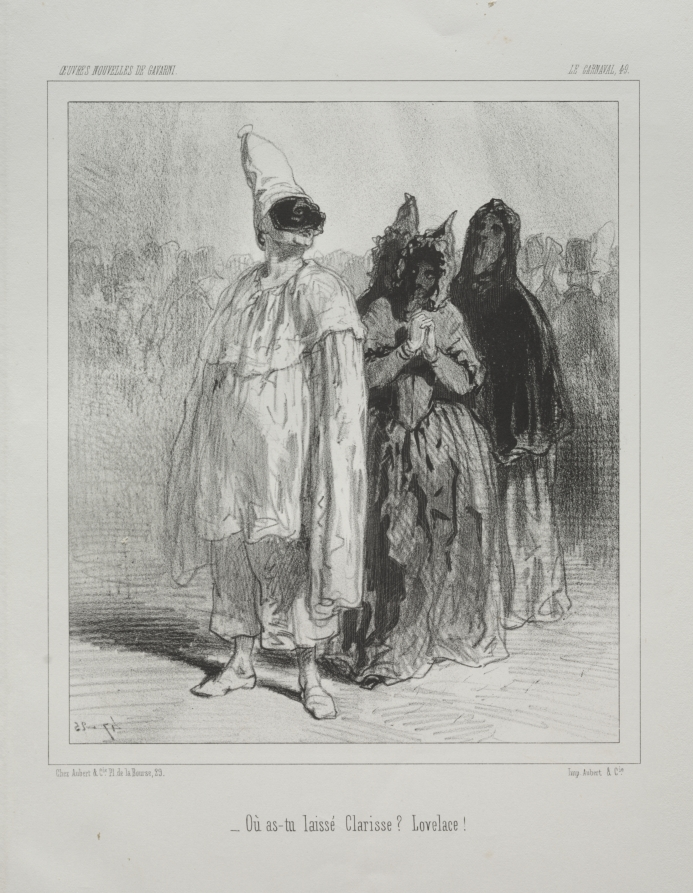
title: Carnaval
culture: France, 19th century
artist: Paul Gavarni (French, 1804–1866)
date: c. 1841–47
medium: lithograph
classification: Print